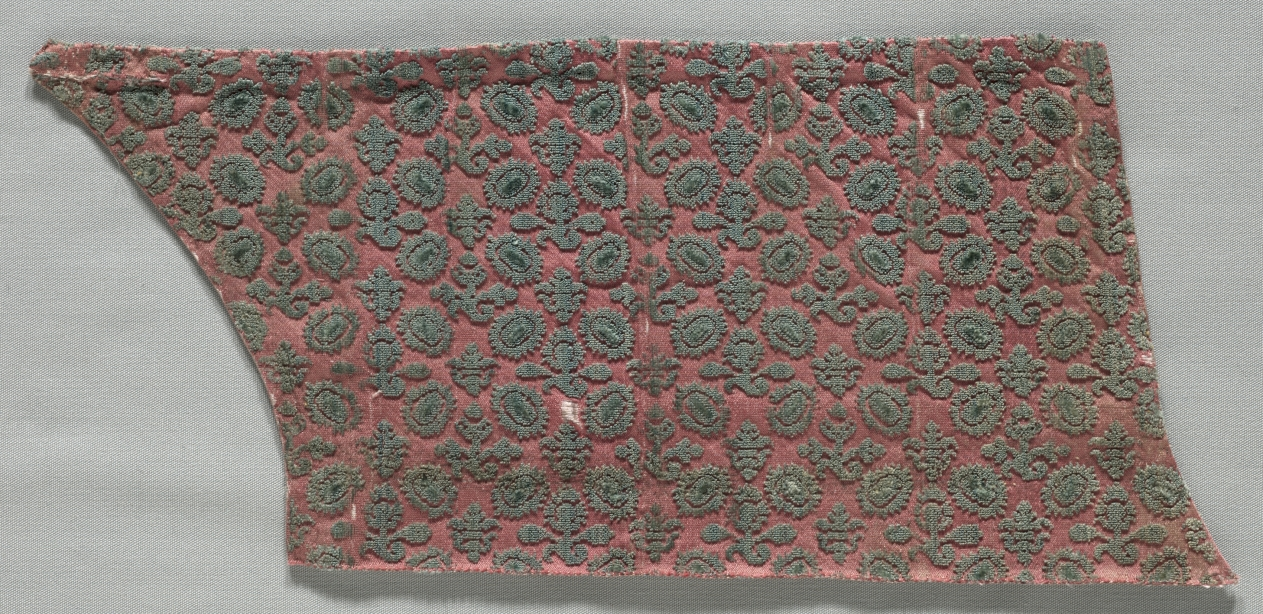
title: Velvet Fragment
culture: Italy, late 16th - 17th century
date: late 1500s - 1600s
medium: velvet (cut and uncut); silk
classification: Velvet